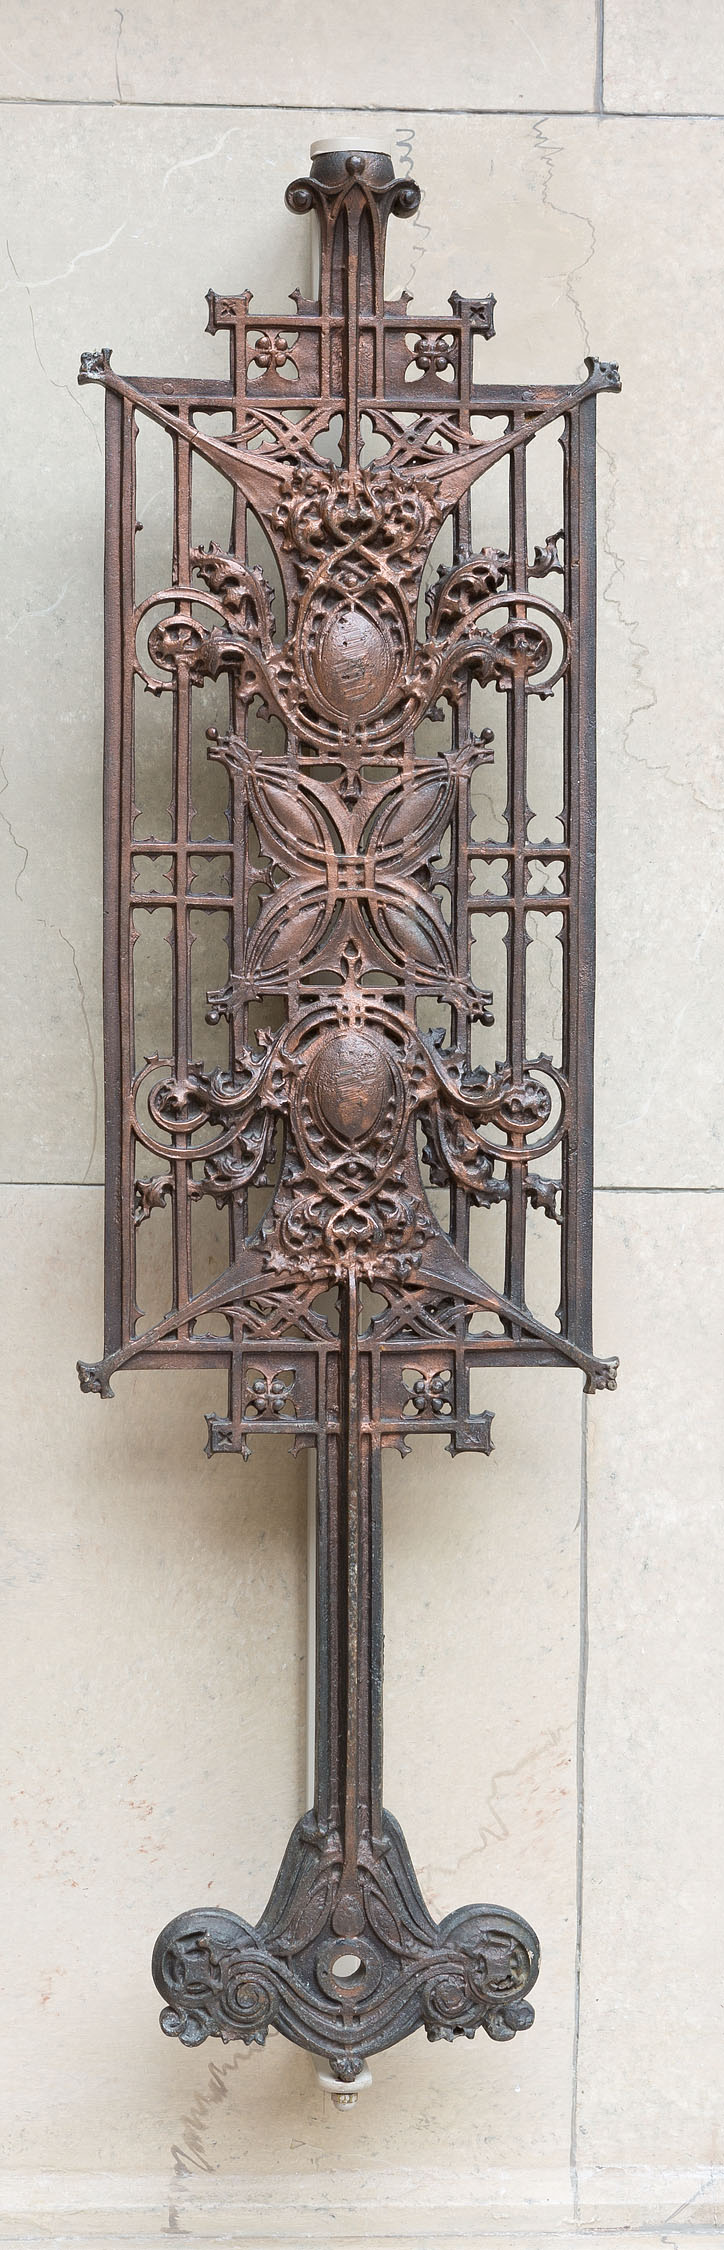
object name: Architectural fragment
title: Schlesinger and Mayer Company Store, Chicago, Illinois, Baluster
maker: Louis H. Sullivan (American, 1856–1924)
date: 1898–1899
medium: Copper plated iron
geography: United States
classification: copper plate; architectural fragment